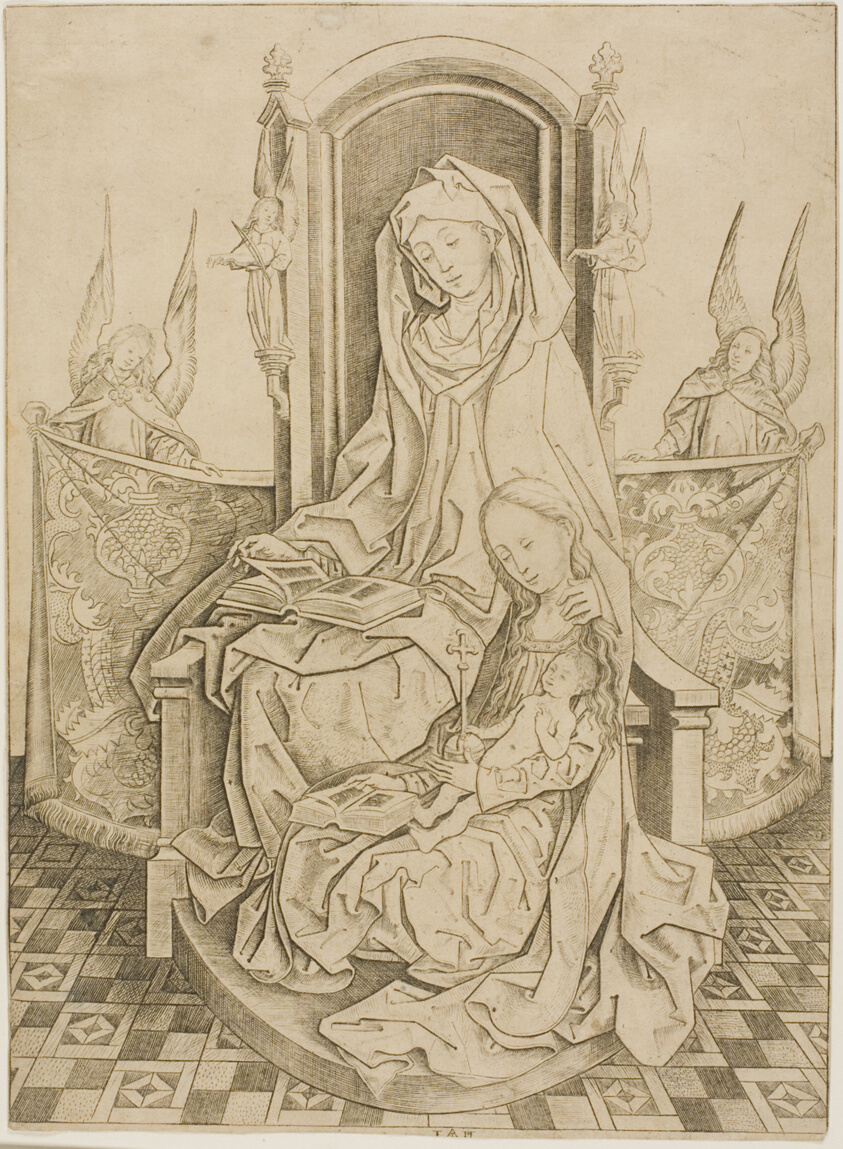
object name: Print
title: St. Anne, The Virgin and Child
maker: Master I.A.M. of Zwolle (Netherlandish, active c. 1470-95)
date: c. 1485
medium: Engraving in black on paper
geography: Netherlands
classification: engraving; print; prints and drawing